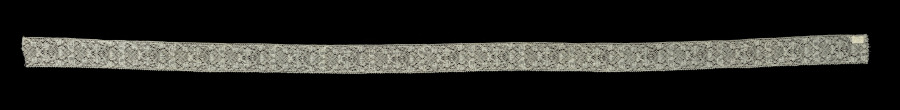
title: Lace Edging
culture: Belgium, Binche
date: 1900–1935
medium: Linen: bobbin lace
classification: Lace